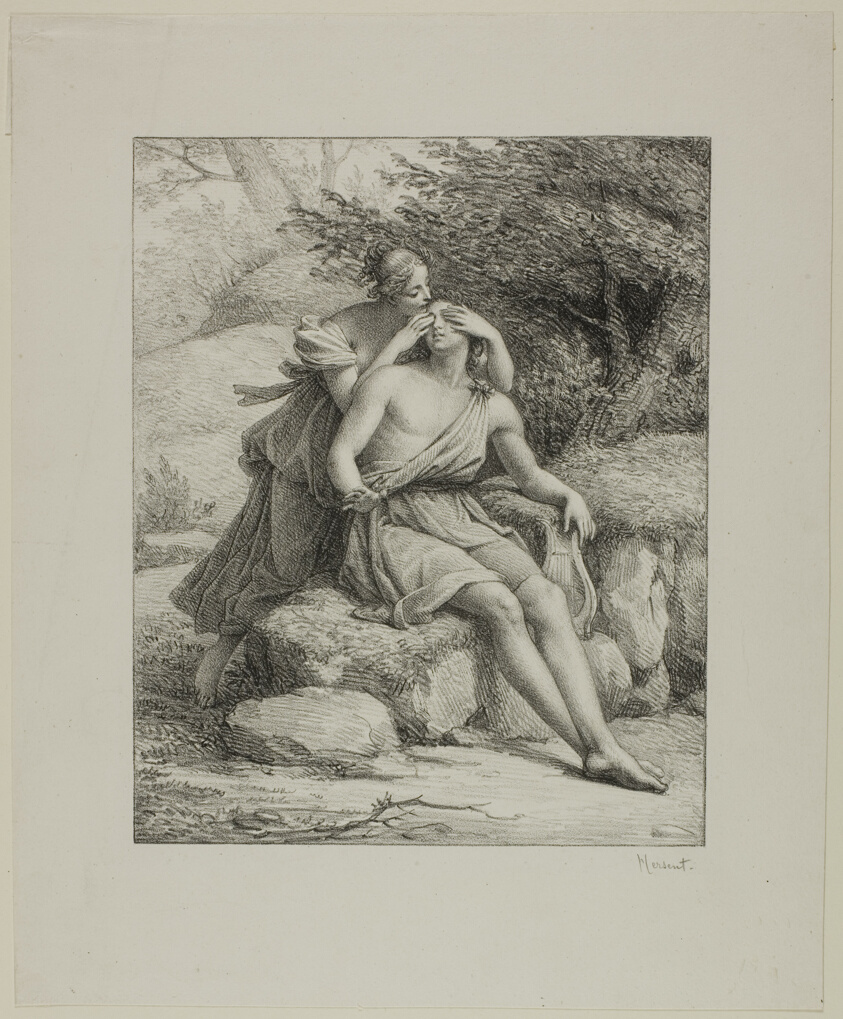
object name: Print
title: Orpheus and Eurydice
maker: Louis Hersent (French, 1777-1860)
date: 1800/30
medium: Lithograph on cream wove paper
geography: France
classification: lithograph; print; prints and drawing